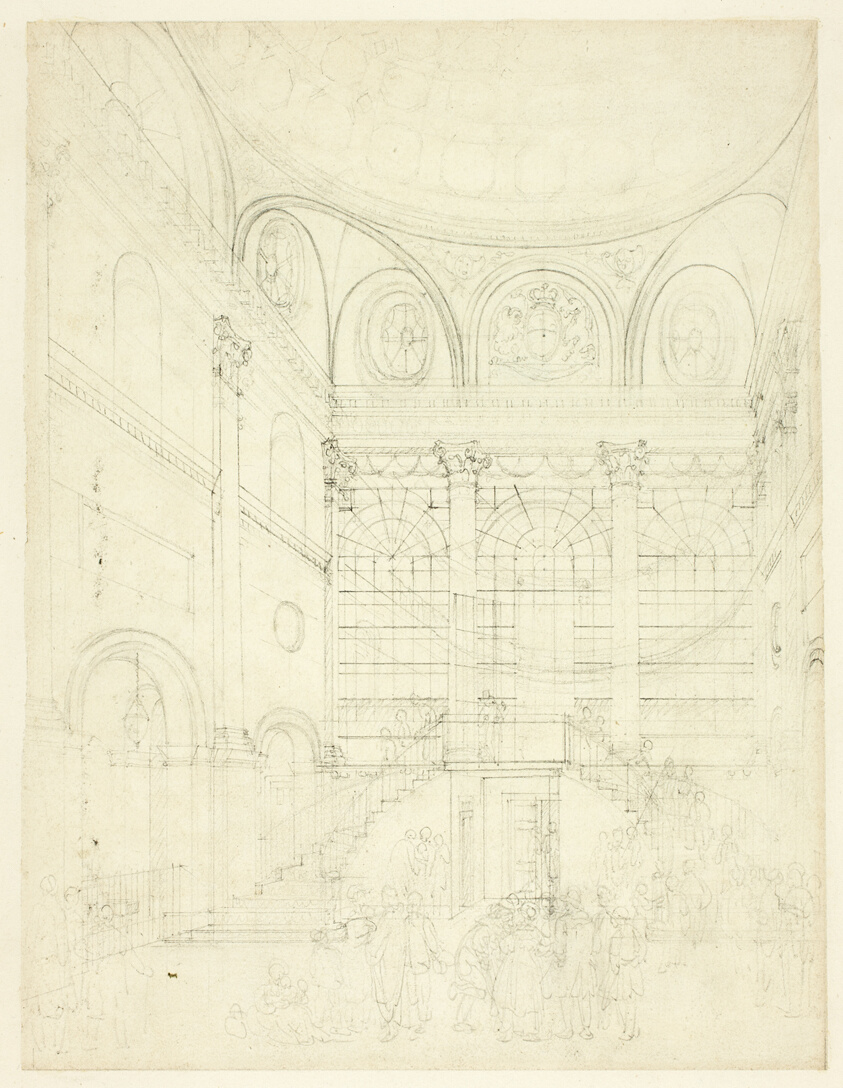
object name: Drawing and Watercolor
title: Study for Session House, Clerkenwell, from Microcosm of London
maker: Augustus Charles Pugin (English, born France, 1762-1832); Thomas Rowlandson (English, 1756-1827)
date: c. 1809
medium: Graphite on ivory wove paper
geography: England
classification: graphite; drawings (visual works); prints and drawing